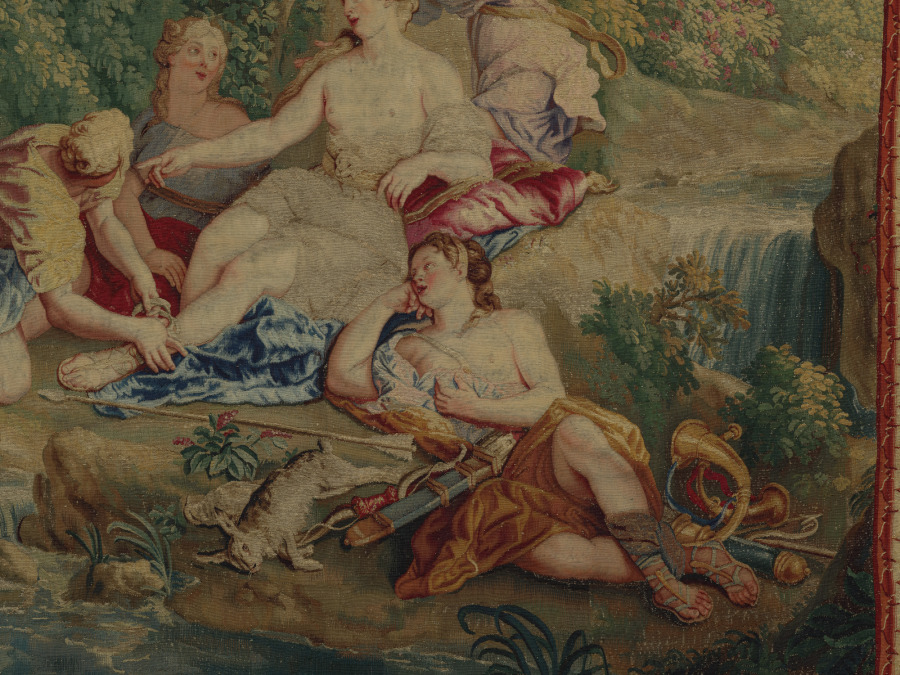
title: Diana's Return from the Chase (from Set of Ovid's Metamorphoses)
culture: France, 18th century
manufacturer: Gobelins Manufactory (France, Paris, est. 1662)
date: 1704–1731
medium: tapestry weave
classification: Tapestry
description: This tapestry’s elaborate border emulates a gilt picture frame, a key characteristic of eighteenth-century Gobelins tapestries. It portrays the goddess Diana at two distinct moments, during and following the hunt, the first accompanied by three dogs, and the second reclining among five attendants. The figures are positioned in a lush landscape near a small stream. A putto, poised to place an arrow in his bow, hovers above Diana. Goddess of the hunt and associated with wild animals and the moon, Diana can be identified by the crescent worn above her forehead. The dead hares indicate a successful hunt.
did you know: During the French Revolution, Gobelins tapestries were sometimes disassembled to harvest the gold threads.